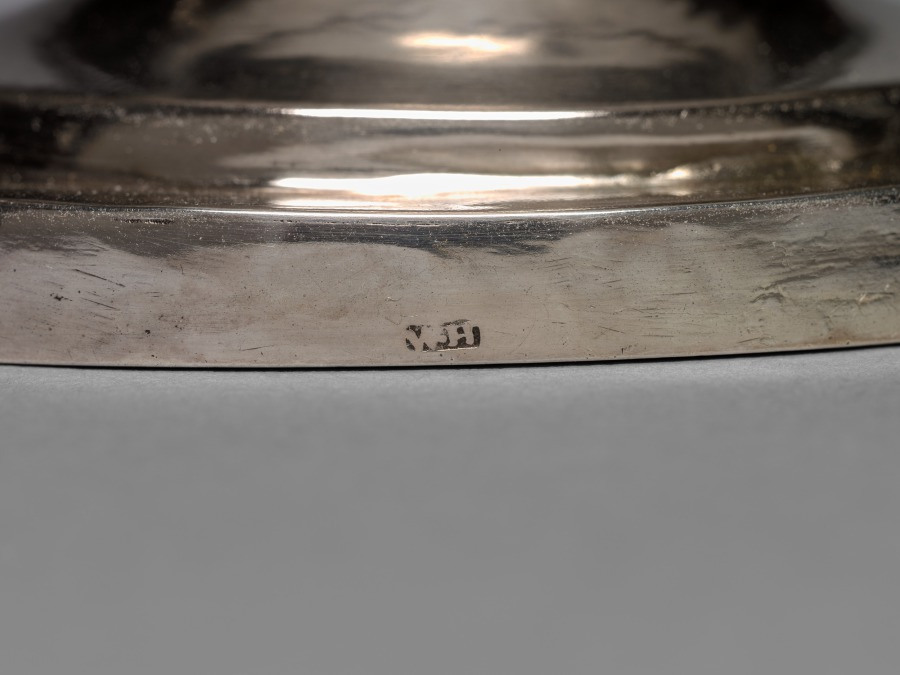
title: Cream Jug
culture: America, Pennsylvania, Philadelphia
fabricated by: William Haverstick (American, 1756–1823)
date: c. 1800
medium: silver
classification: Silver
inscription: engraved "MP" in bright-cut script on side to right of handle.